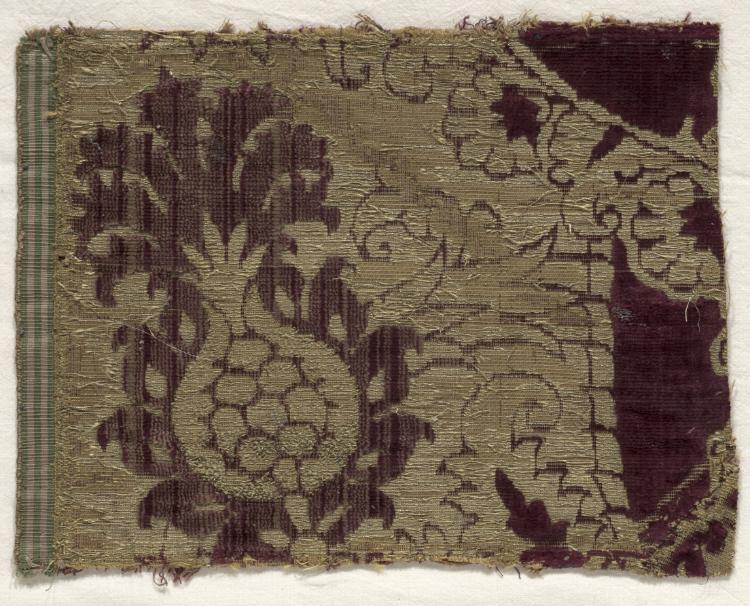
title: Velvet Fragment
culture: Spain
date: 1400s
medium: velvet (cut, uncut, and brocaded); silk and gold thread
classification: Velvet